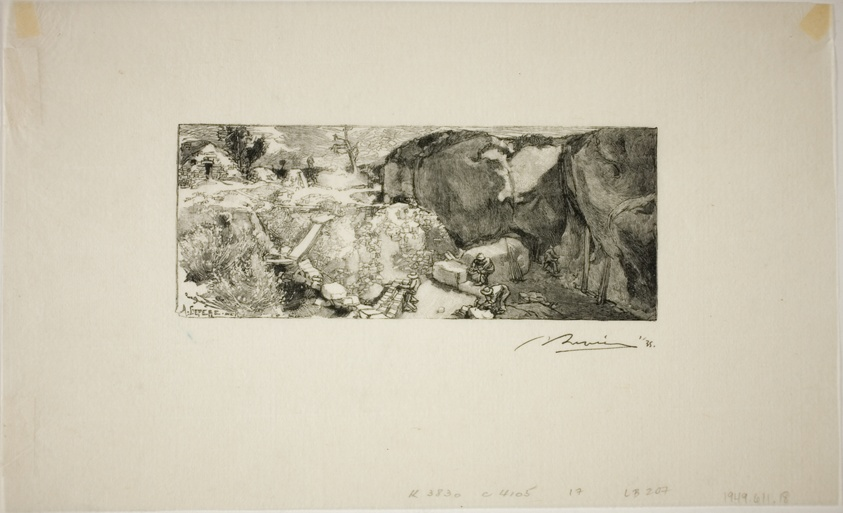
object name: Print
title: Sandstone Quarry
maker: Louis Auguste Lepère (French, 1849-1918); published by A. Desmoulins (French, active c. 1908-1910)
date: 1890, published 1908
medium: Wood engraving in black on cream laid Japanese paper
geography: France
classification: wood engraving; print; prints and drawing